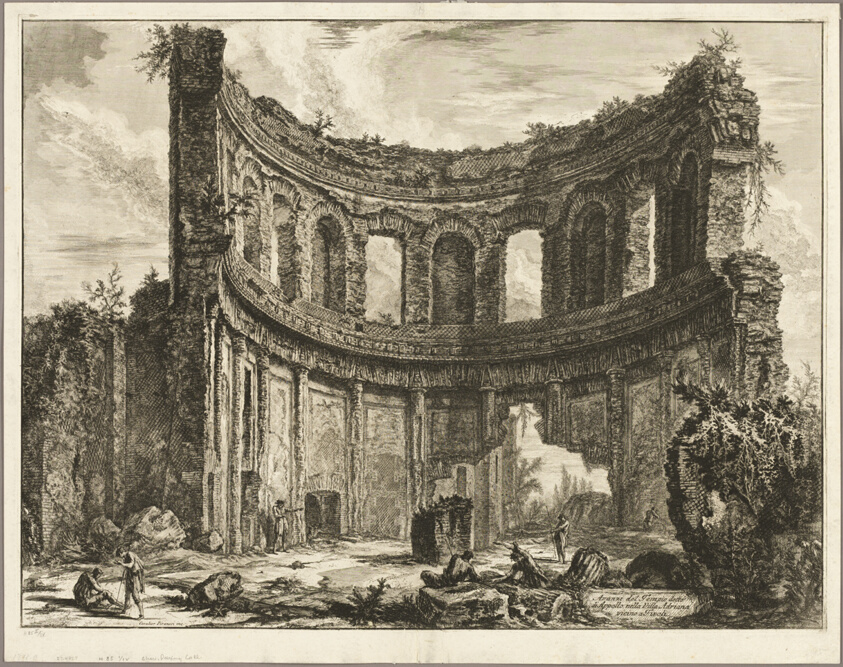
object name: Print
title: Remains of the so-called Temple of Apollo at Hadrian's Villa, Tivoli, from Views of Rome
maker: Giovanni Battista Piranesi (Italian, 1720-1778)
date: 1768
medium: Etching on heavy ivory laid paper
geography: Italy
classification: etching; print; prints and drawing